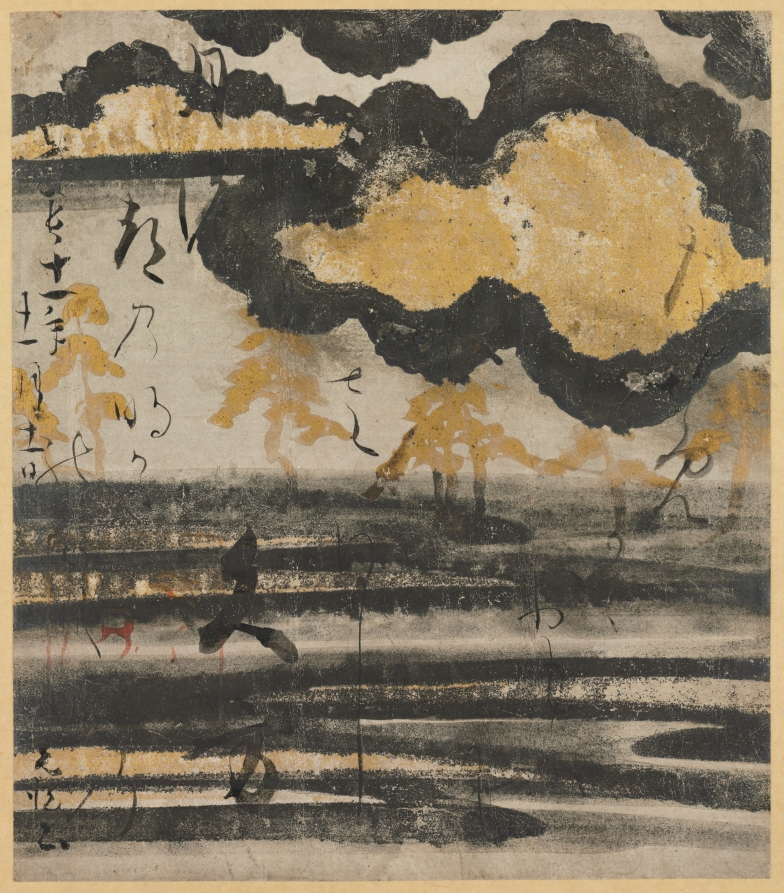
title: Poem-card from the Shinkokin wakashu (New Collection of Japanese Poems from Ancient and Modern Times) with Design of Pine on a Beach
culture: Japan, Momoyama (1573-1615) - Edo (1615-1868) periods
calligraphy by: Hon'ami Kōetsu (Japanese, 1558–1637)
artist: Tawaraya Sōtatsu (Japanese, c. 1570–c. 1640)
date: 1606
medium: card mounted on a hanging scroll; gold, silver, and ink on paper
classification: Painting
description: Tawaraya Sotatsu and Hon’ami Koetsu are both associated with the founding of the Rimpa school of Japanese painting. In this poem-card––one of 16 that survive––Tawaraya painted the gold and silver design, over which Hon’ami recorded poems from Shinkokin wakashu. The verses read from top to bottom and from right to left: "Even as I gaze, the thought of it is lonely. High in the heavens the moon-capital lies still in the sky of its dawning."